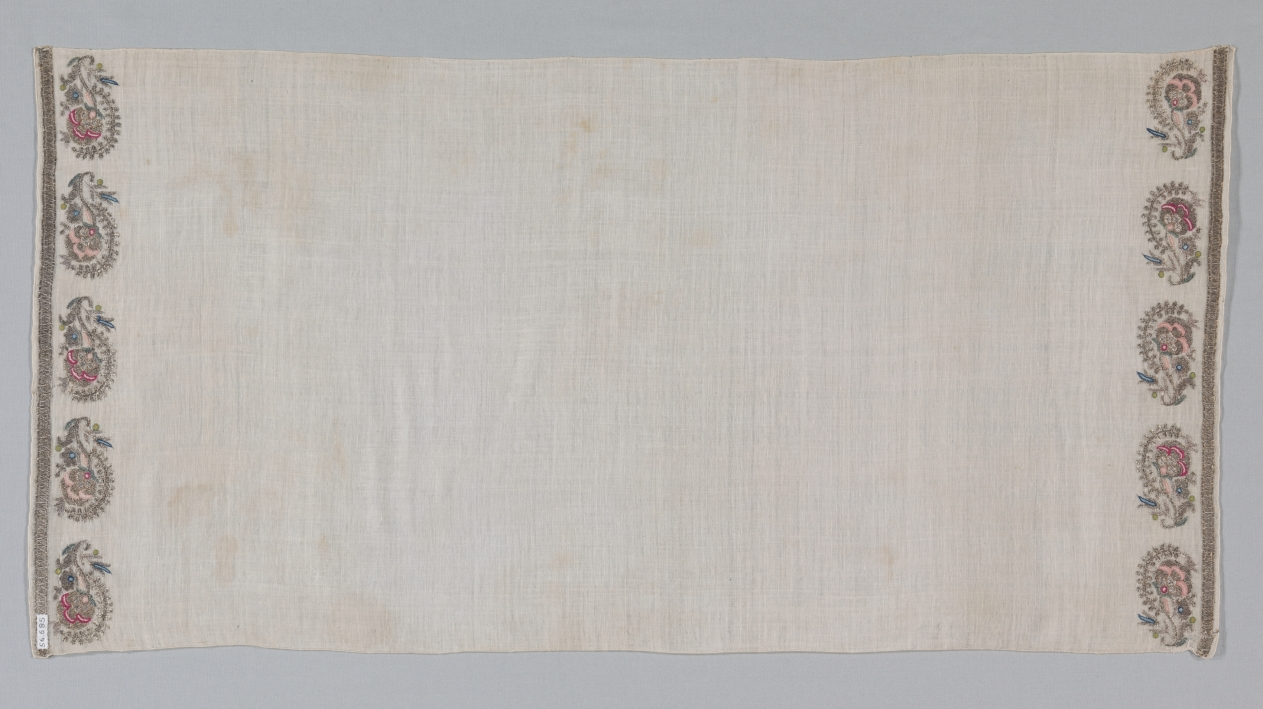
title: Embroidered Towel (Peshkir)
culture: Turkey, 19th century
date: 19th century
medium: embroidery; silk and gold filé on cotton tabby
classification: Embroidery